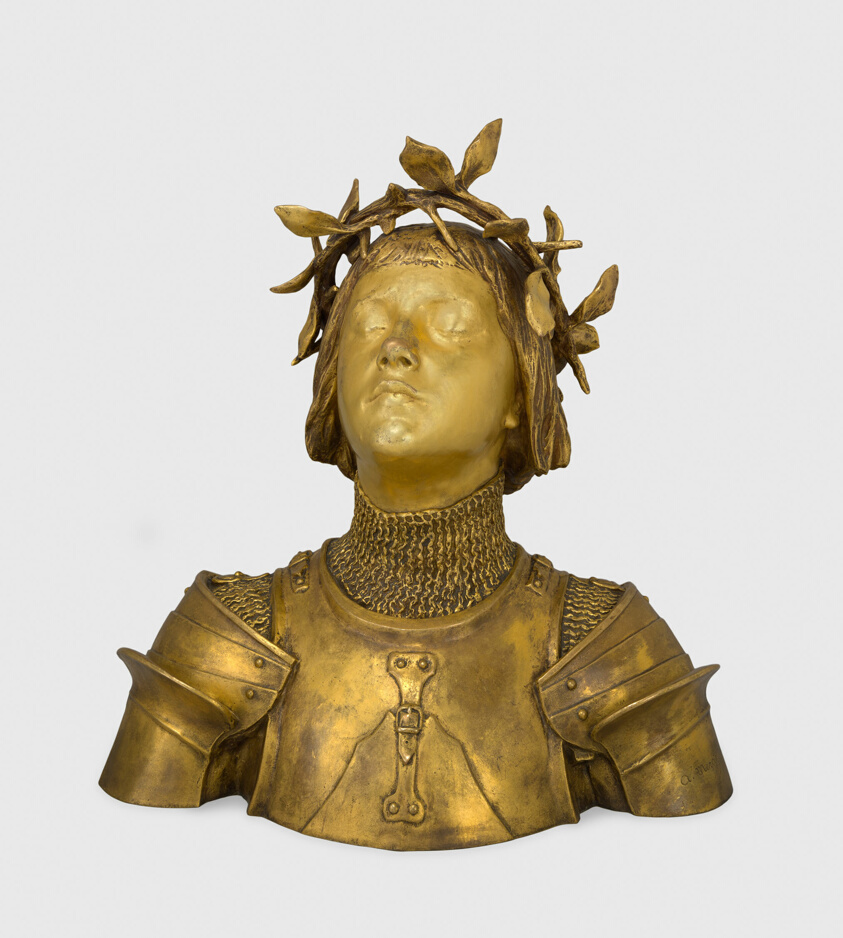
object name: Sculpture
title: Jeanne d'Arc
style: nineteenth century, 19th century, 20th Century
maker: Antonin Mercié (French, 1845–1916); Foundry: Barbedienne, Paris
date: 1875/1900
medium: Gilt bronze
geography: France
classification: bust/head; sculpture; portrait; french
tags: portraits: female subject, armor, laurel wreaths, martyrs, portrait, portraits, portraits: French subject, woman